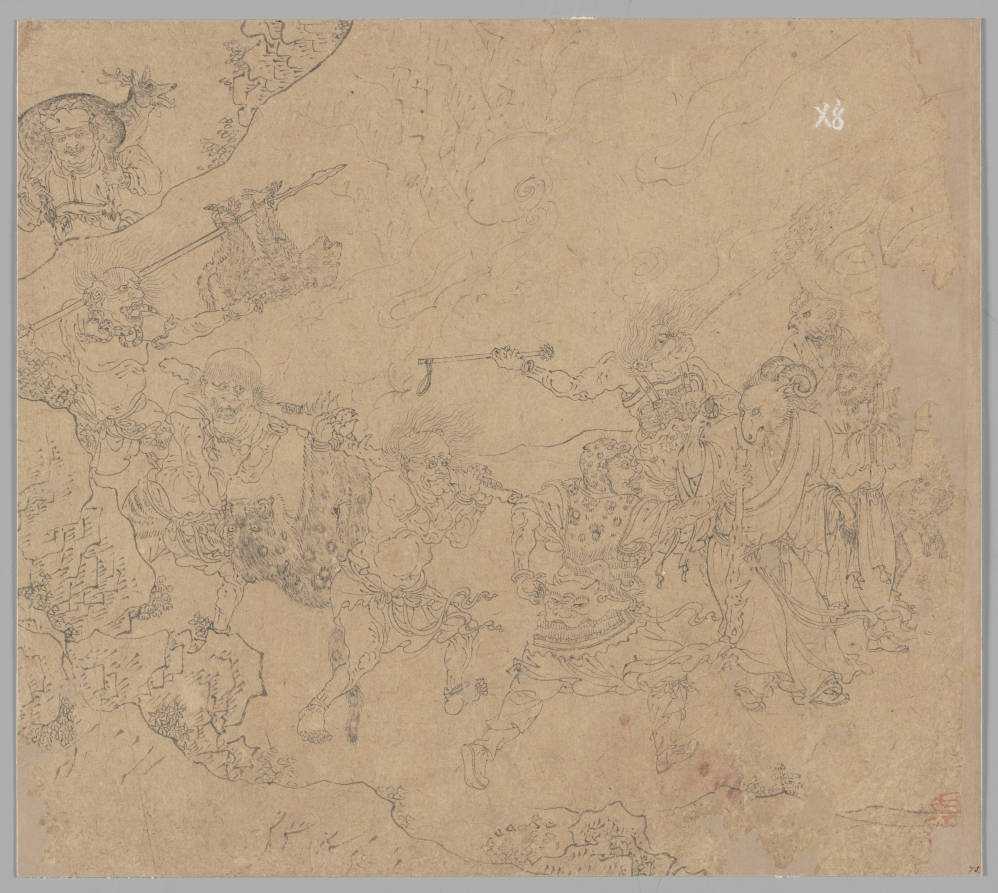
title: Album of Daoist and Buddhist Themes: Search the Mountain: Leaf 45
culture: China, Southern Song dynasty (1127-1279)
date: 1200s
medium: Album, ink on paper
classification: Painting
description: This extraordinary album has 50 paintings on a variety of religious subjects. They were likely created by several master craftsmen to share with studio apprentices as models for fulfilling commissions. The Jade Emperor and the Daoist pantheon make up the first 26 leaves. The next 14 leaves portray the Buddhist Ten Kings of Hell administering punishments to the dead. The third section, called “Clearing the Mountains,” features divine soldiers, led presumably by the deity Erlang Shen 二郎神, fighting undesirable creatures.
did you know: On the left, demon-soldiers carry their prey. On the right, half-animal figures, one with a ram’s head, are ushered forward and driven out of the mountain.